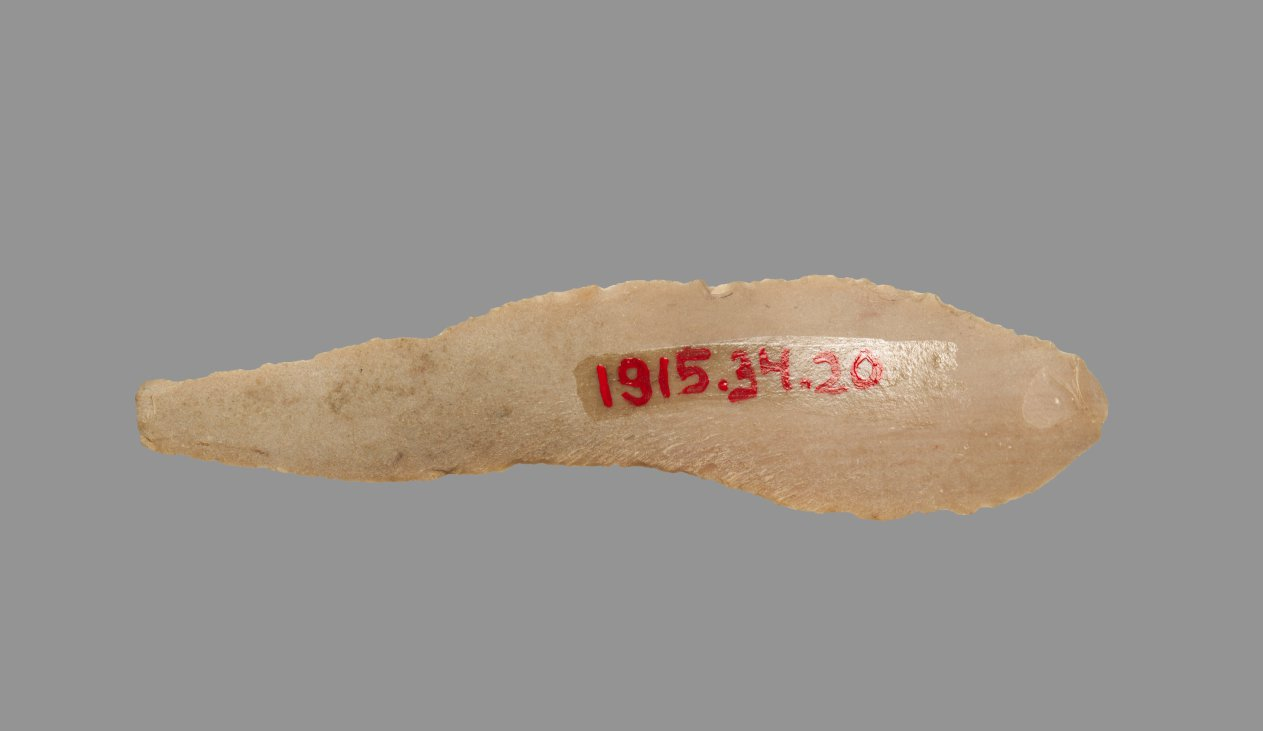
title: Sickle Blade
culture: Egypt, Middle Kingdom (2040–1648 BCE), Dynasty 12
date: 1980–1801 BCE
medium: flint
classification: Implements